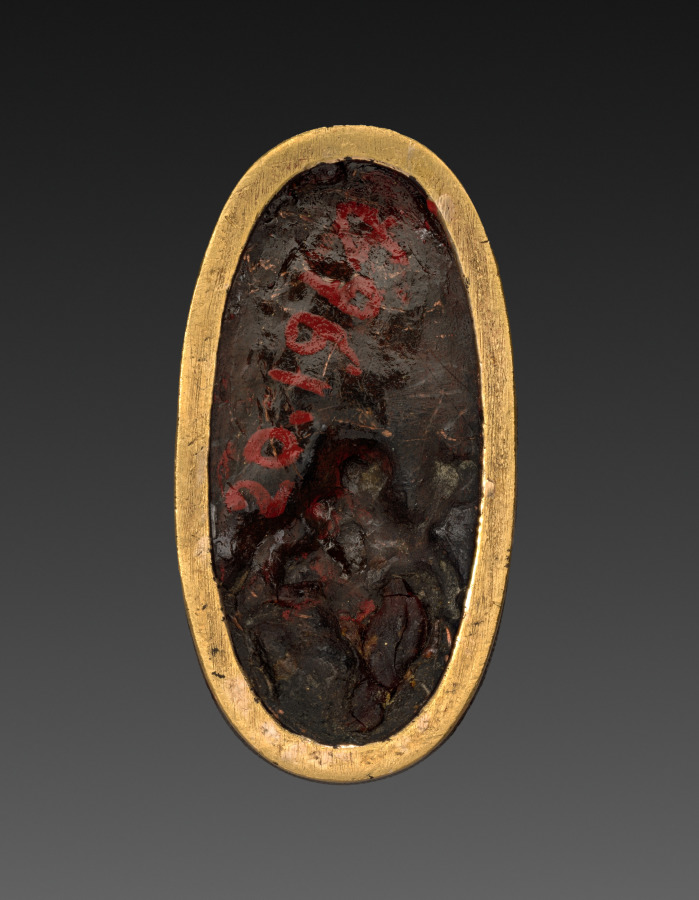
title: Sword-Hilt Pommel (Kashira)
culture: Japan, Edo period (1615–1868)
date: 1700–1850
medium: shakudo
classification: Arms and Armor